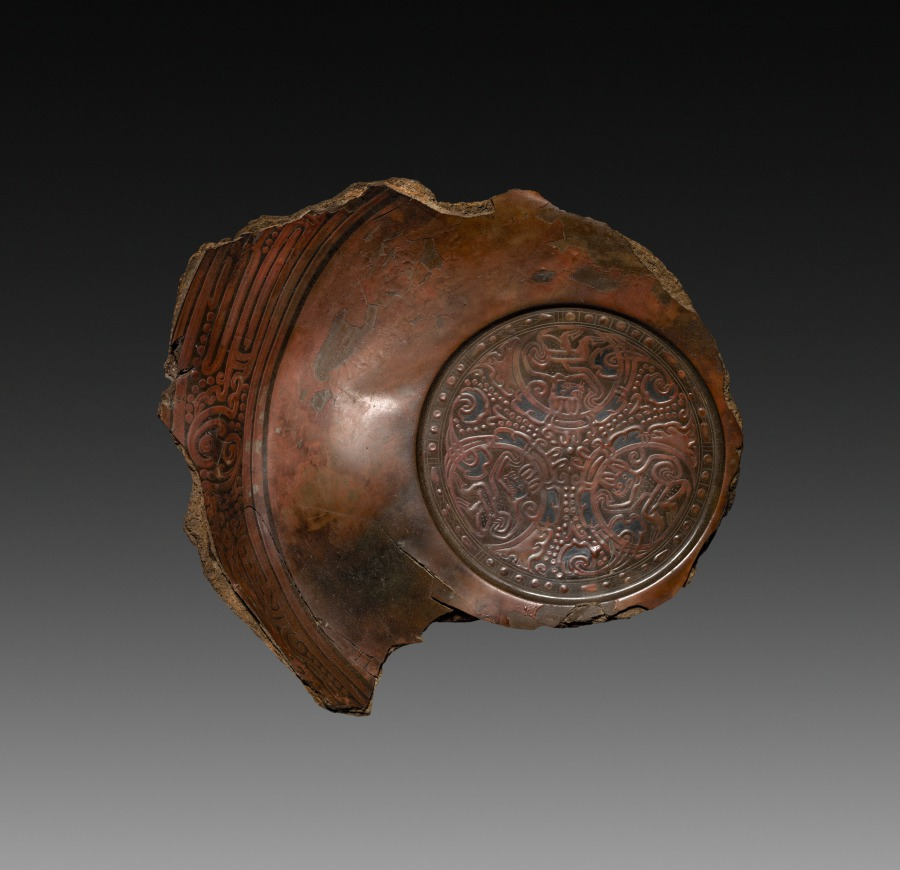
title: Fragment of a Lacquer Tray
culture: China, excavated at Lolang, Xin dynasty (9–23 CE)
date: 9 CE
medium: lacquer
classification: Lacquer